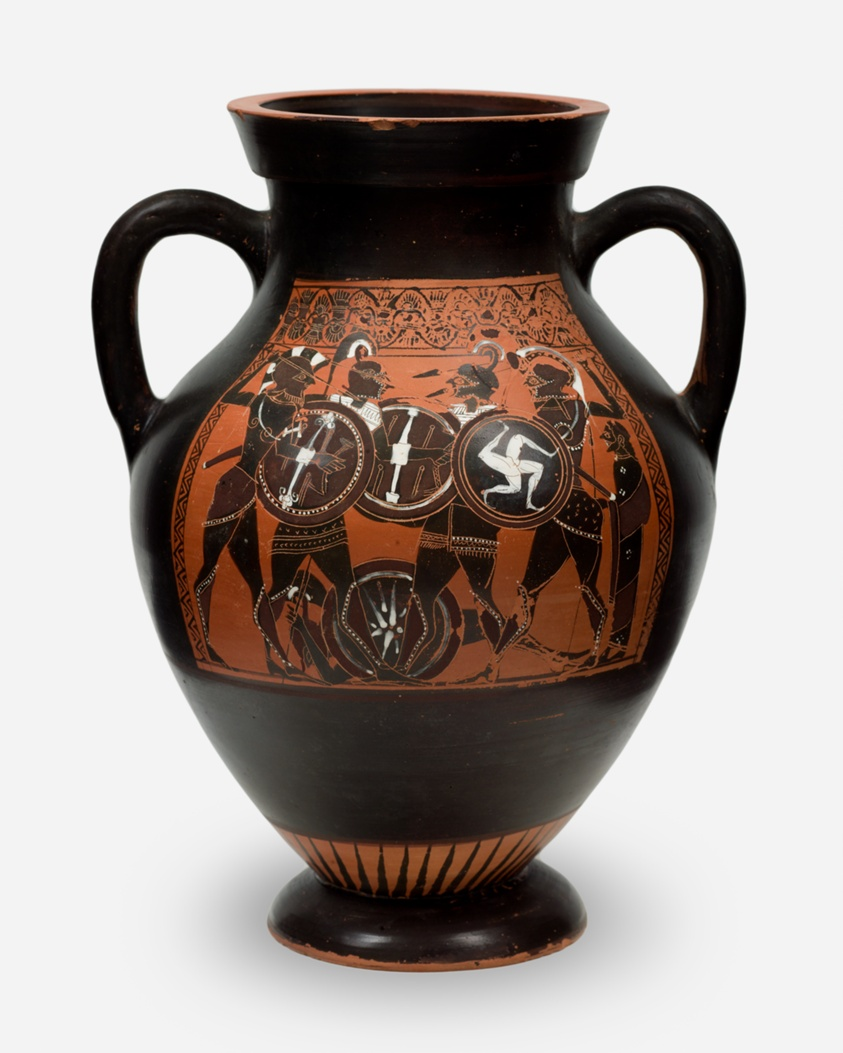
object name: Vessel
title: Belly-Amphora (Storage Jar)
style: archaic (greek), attic, black-figure, ancient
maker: Attributed to the Painter of Berlin 1686 or the Painter of Tarquinia RC 3984; Greek; Athens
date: 550-540 BCE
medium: terracotta, black-figure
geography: Athens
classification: amphora; earthenware; ceramics; vessel; ancient art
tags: mythology